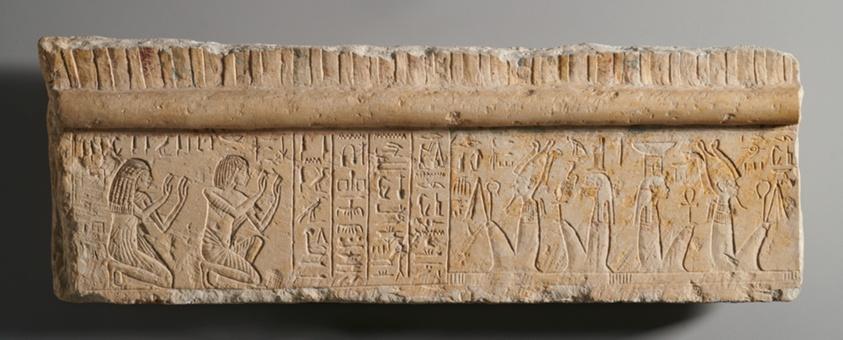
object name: Architectural fragment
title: Lintel Fragment Depicting Iniuia and Iuy Worshipping Deities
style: new kingdom, ancient, egyptian, eighteenth dynasty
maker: Egyptian; Tomb of Iniuia and Iuy, Saqqara, Egypt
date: New Kingdom, Dynasty 18, reign of Tutankhamun (about 1336–1327 BCE)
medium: Limestone and pigment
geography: Egypt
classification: architectural fragment; stone; sculpture; ancient art; relief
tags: praying, goddesses, gods (deities), Hieroglyphs, men, women